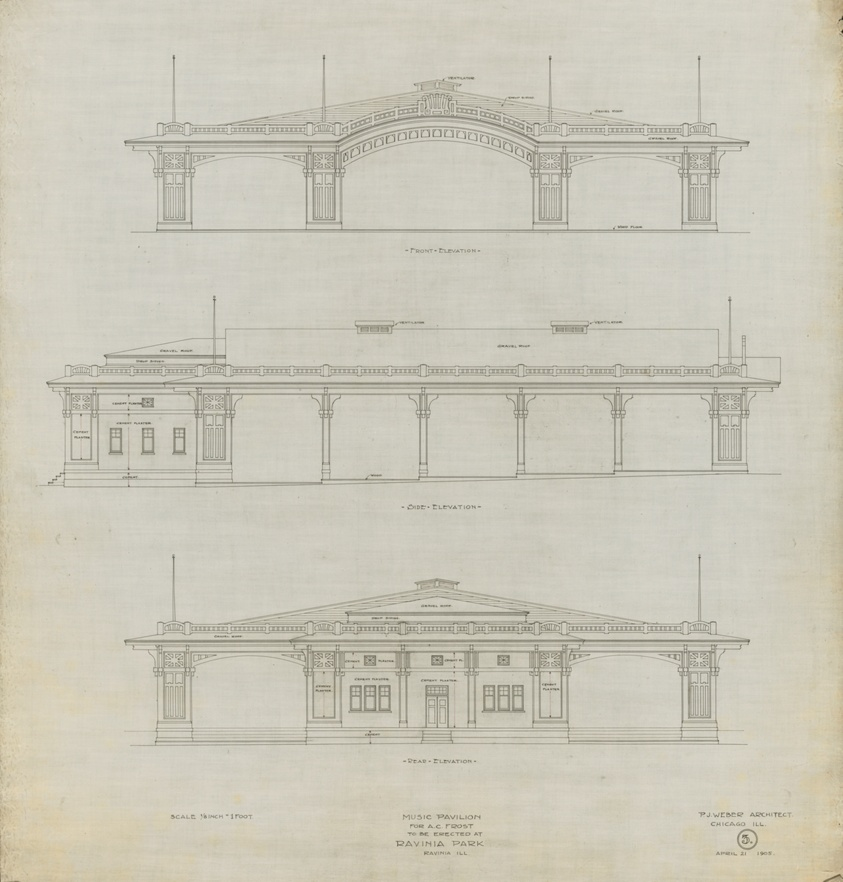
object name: Architectural Drawing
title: Ravinia Music Pavilion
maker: Peter J. Weber; American, born Germany, 1863-1923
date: 1905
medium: Ink on linen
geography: Ravinia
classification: ink; architectural drawing